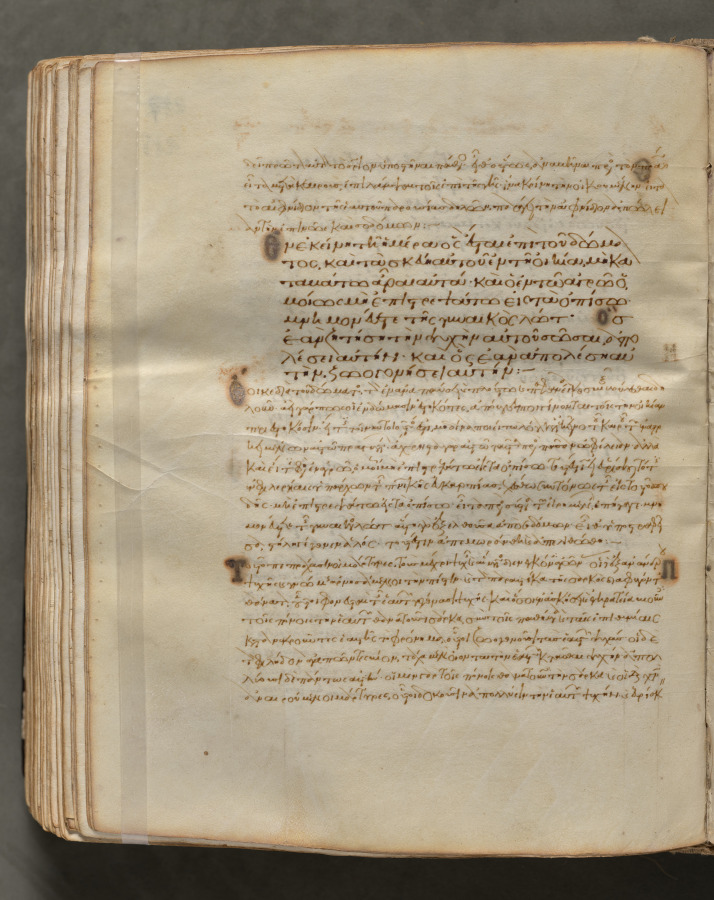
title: Text, folio 288 (verso), from a Gospel Book with Commentaries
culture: Byzantium, Constantinople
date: c. 1000–1100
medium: ink, tempera, and gold on vellum; leather binding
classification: Bound Volume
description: Each of the four gospels in this book opens on a page with brilliantly illuminated borders depicting the author of the text as well as birds—principally peacocks, symbols of the immortality of the soul—and fountains, representing the fountain of life and the salvation of the soul. This volume consists of 428 leaves with texts in Greek. Its level of sophistication suggests that it was probably written and decorated in a monastery in Constantinople.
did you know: Gospel books were carried in procession through Byzantine churches.